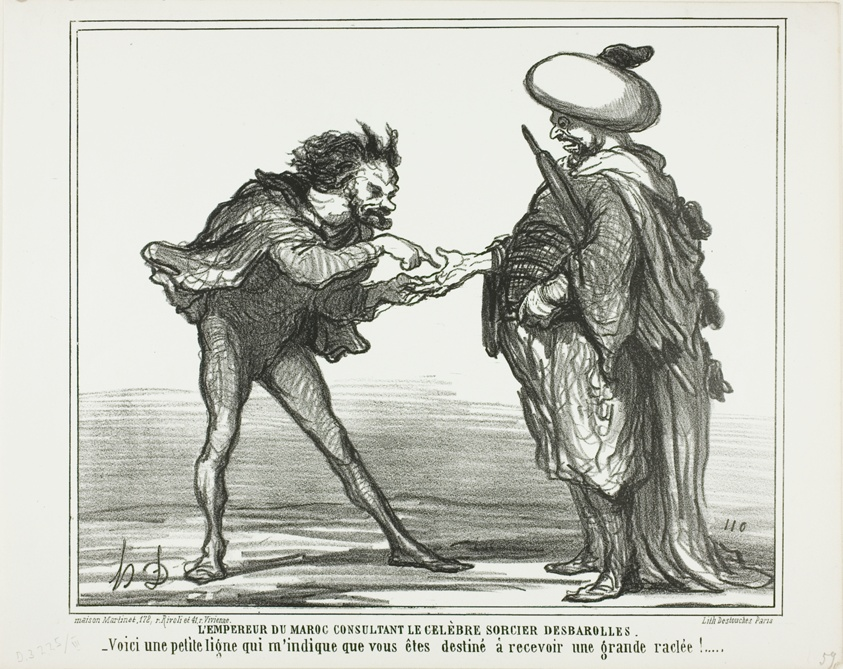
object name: Print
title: The Emperor of Morocco in Consultation With the Famous Magician Desbarolles. “- This small line here indicates to me that you are going to get a royal thrashing!,” plate 126 from Actualités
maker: Honoré Victorin Daumier; French, 1808-1879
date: 1859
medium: Lithograph in black on white wove paper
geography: France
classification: lithograph; print; prints and drawing